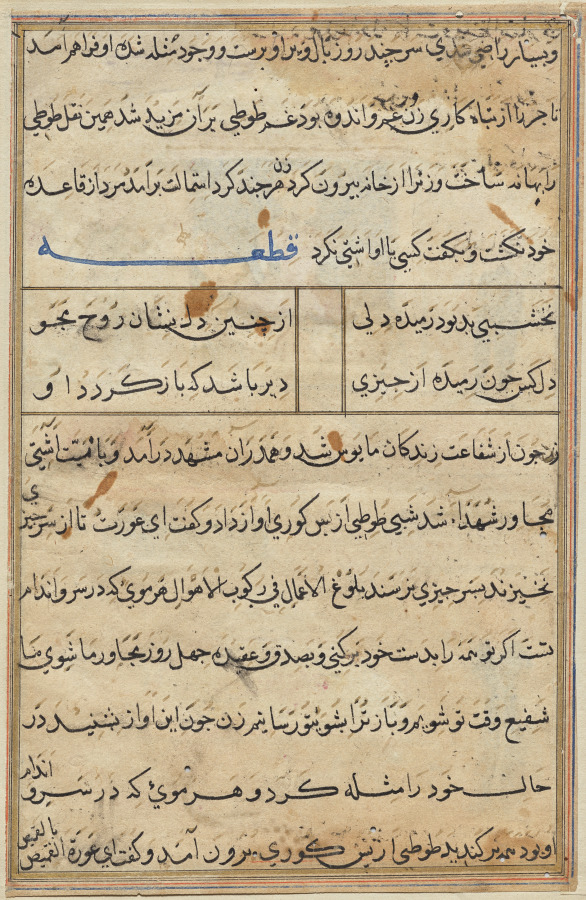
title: Page from Tales of a Parrot (Tuti-nama): text page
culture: Mughal India, court of Akbar (reigned 1556–1605)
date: c. 1560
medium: gum tempera, ink, and gold on paper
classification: Painting